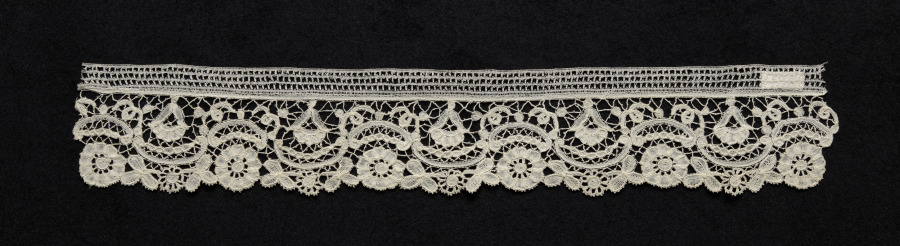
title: Lace Edging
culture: Belgium, Brussels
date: 1800s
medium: Linen: bobbin lace (Duchesse)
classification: Lace